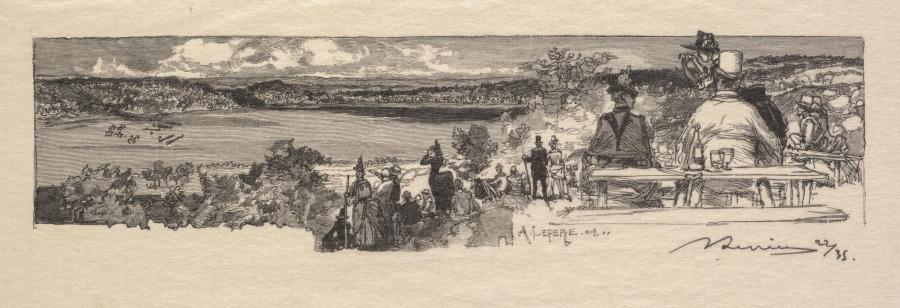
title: Fontainebleau Forest: Valley of the Solle (La Forêt de Fontainebleau: La Vallée de la Solle)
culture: France, 19th century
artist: Auguste Louis Lepère (French, 1849–1918)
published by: A. Desmoulins, Published in Revue Illustrée, 1887–90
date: 1890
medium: wood engraving from bound volume of 34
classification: Bound Volume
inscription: In block, near center: A. LEPERE Del. sc.; below image, lower right, in black ink: ALepère 22/35; on window mat, lower right, in graphite: La Vallée de la Sole